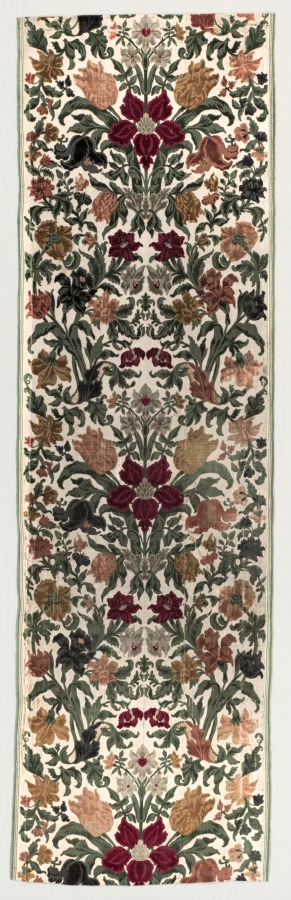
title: Lengths of Floral Velvet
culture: Italy, Genoa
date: 1600s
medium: velvet (cut, uncut, voided); silk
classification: Velvet